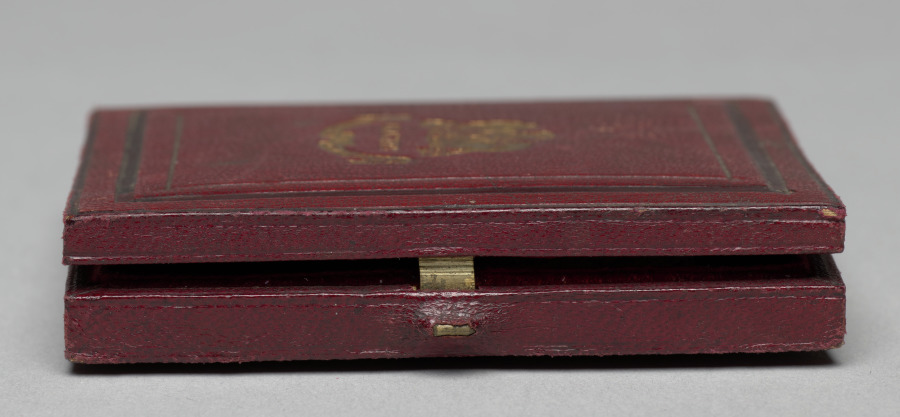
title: High-born lady in white bonnet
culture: France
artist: Antoine Claudet (French, 1797–1867)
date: c. 1855–58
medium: daguerreotype, tinted, sixth plate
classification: Photograph